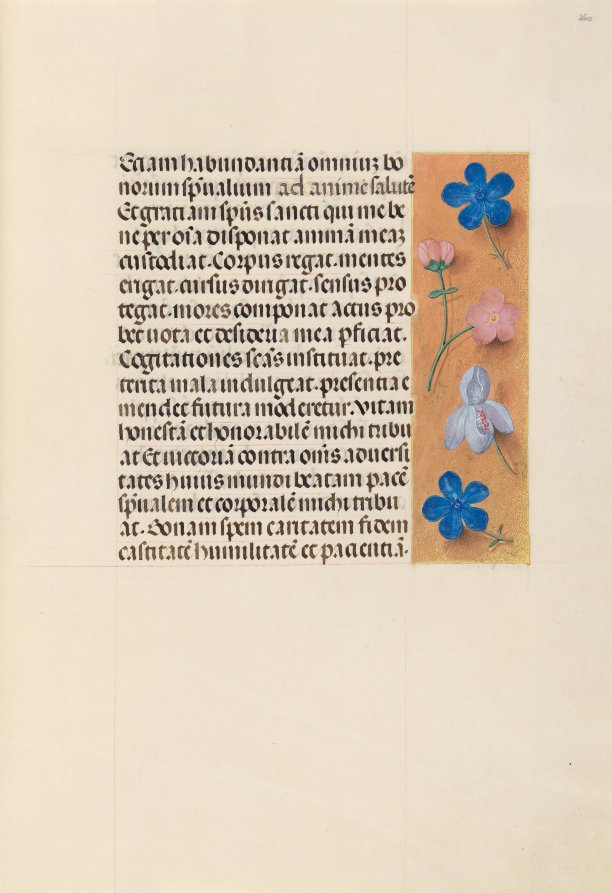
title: Hours of Queen Isabella the Catholic, Queen of Spain: Fol. 260r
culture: Flanders, Ghent and Bruges, late 15th century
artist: Master of the First Prayerbook of Maximillian (Flemish, c. 1444–1519)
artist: and Associates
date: c. 1500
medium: ink, tempera, and gold on vellum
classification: Bound Volume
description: This manuscript was illuminated by a circle of at least five highly organized manuscript painters active in the Flemish cities of Ghent and Bruges. The principal illuminator was Alexander Bening, who painted the majority of the book's miniatures. Manuscripts produced by this circle of artists are renowned for the decoration of their borders, which typically feature a rich variety of realistically-painted flowers, birds, and butterflies. This prayer book, called a book of hours, was intended not for a cleric, but for the private devotions of a lay person-in this case, Isabella the Catholic, Queen of Spain (1451-1504). Isabella's coat of arms embellishes the book's frontispiece. It is unlikely that the book was commissioned by the Queen herself; rather, she probably received it as a diplomatic gift from someone courting her patronage, perhaps Cardinal Francisco Jimenez de Cisneros. A Franciscan friar, Jimenez was dependent upon Isabella for his advancement, first to the post of Queen's confessor in 1492, and then to Archbishop of Toledo in 1495.